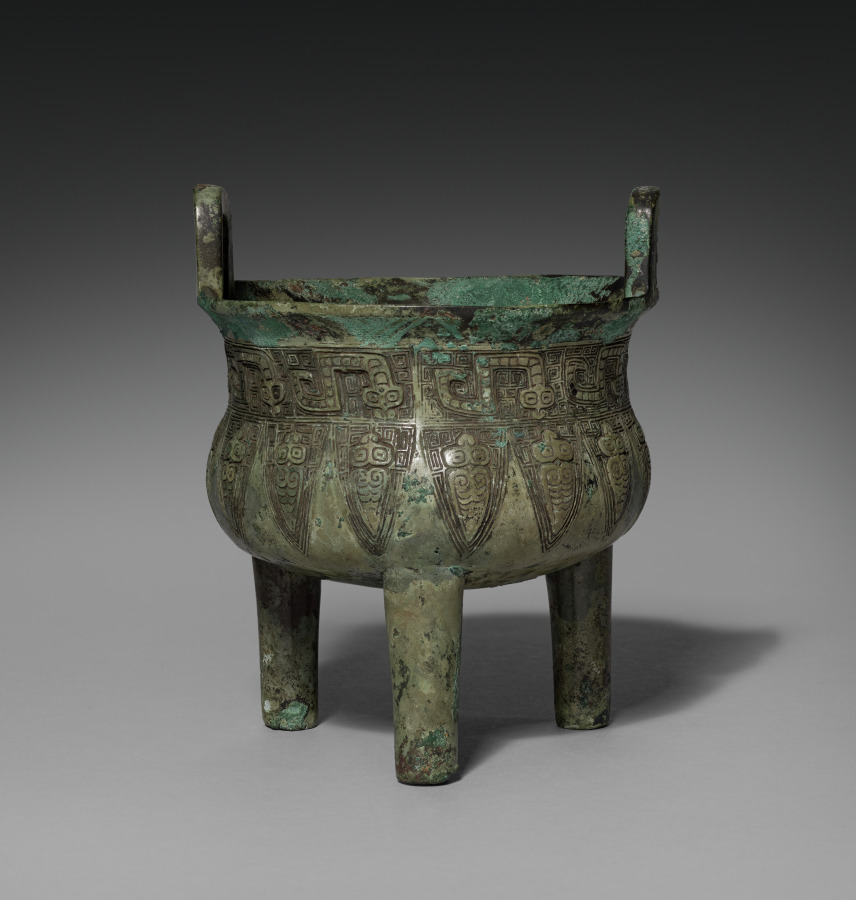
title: Tripod Cauldron (Ding)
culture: China, Shang dynasty (c. 1600–c. 1046 BCE)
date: 1200–1100 BCE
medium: bronze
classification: Metalwork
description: In ancient China, bronze tripods of the type called ding were made in sets of different sizes to be used in rituals in which grain and meat was offered to the spirits of the ancestors. These bronzes were subsequently both collected items and major scholarly preoccupations in Chinese history. They were prized art treasures that provide source materials for Chinese historiography and antiquity studies. Catalogues of archaic bronzes have been published since the Song dynasty. Scholars studied the bronze inscriptions, typologies, and terminologies, and these studies exerted an impact in the field well before the birth of modern art history and archaeology.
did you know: The vessel shows a band of silkworms and cicadas in two registers.